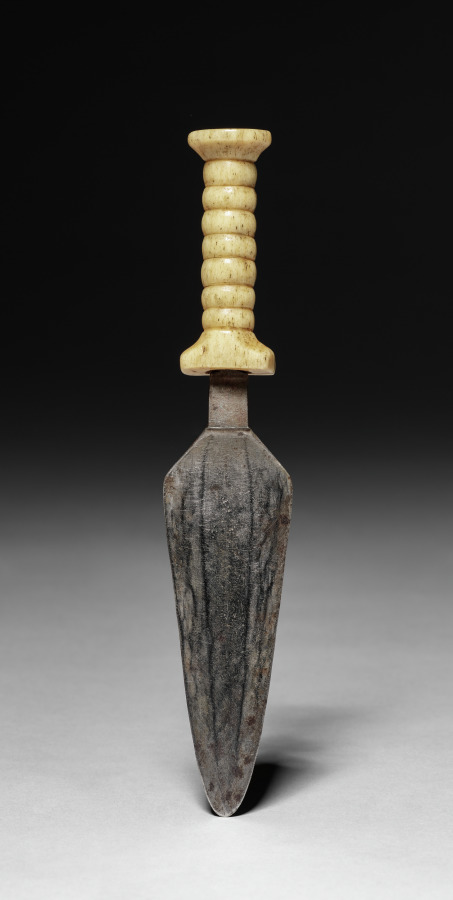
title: Dagger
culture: Africa, Central Africa, Democratic Republic of the Congo, Mangbetu-style maker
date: 1900s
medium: Iron and elephant ivory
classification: Arms and Armor